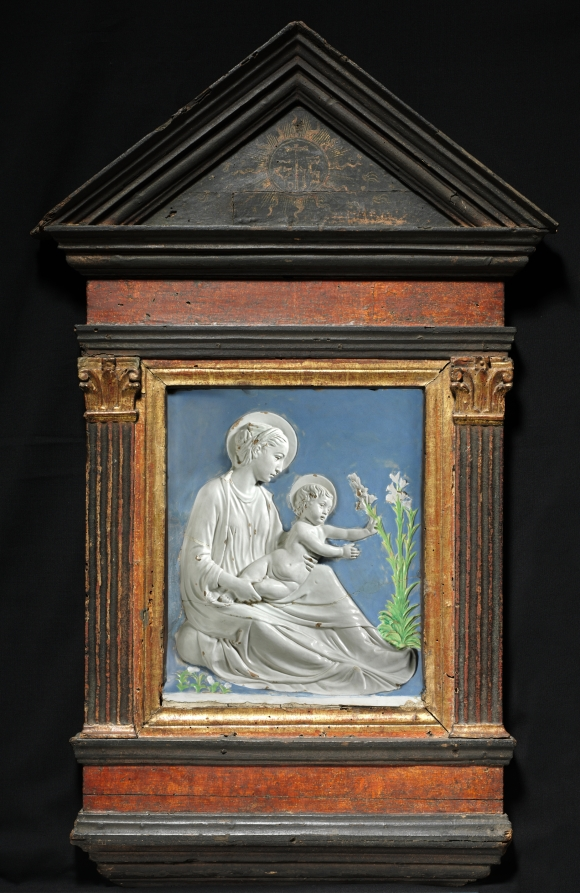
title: Madonna and Child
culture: Italy, 15th century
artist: Luca della Robbia (Italian, 1400?–1482)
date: c. 1460–1470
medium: glazed terracotta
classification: Sculpture